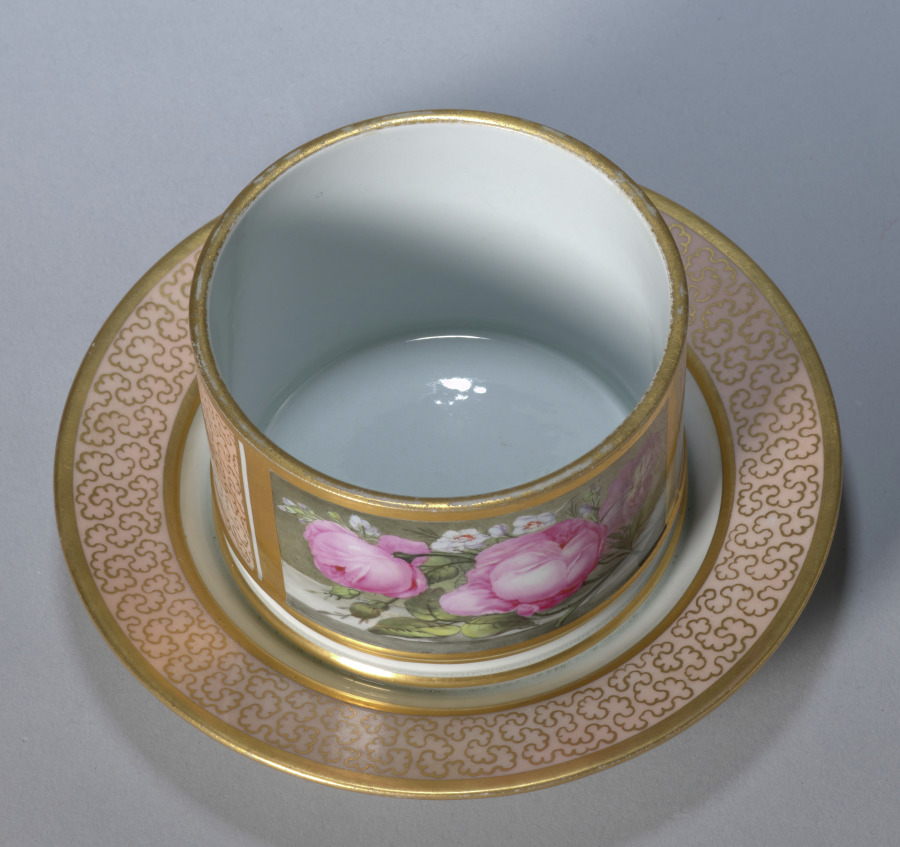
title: Dish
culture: England, Worcester, early 19th Century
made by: Worcester Porcelain Factory (British, established 1751)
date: c. 1810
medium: soft-paste porcelain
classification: Ceramic